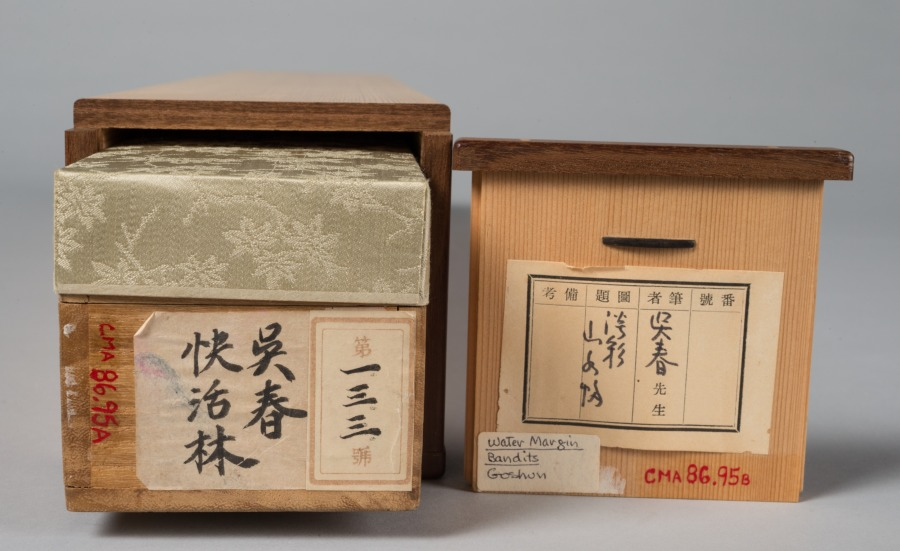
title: Happy Forest, from Water Margin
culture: Japan, Edo period (1615–1868)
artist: Matsumura Goshun (Japanese, 1752–1811)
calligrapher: and Amenomori Shōteki (Japanese, 1731–1786)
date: late 1700s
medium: hanging scroll; ink and color on paper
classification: Painting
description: The Chinese literary classic Water Margin is set in the 1120s and tells the story of 108 outlaws who first rebel against the government and then join forces with it. This painting depicts an episode in which hero Wu Song reclaims the tavern Happy Forest for its rightful owner, the prison warden’s son, Shi En. To prepare for the fight, Wu Song drinks a lot of wine. The painting was inscribed with a quote in which an ally describes Wu Song’s fighting style. It reads as follows: Where his twin fists rise, clouds and thunder roar, When his flying kick comes, wind and rain tremble.